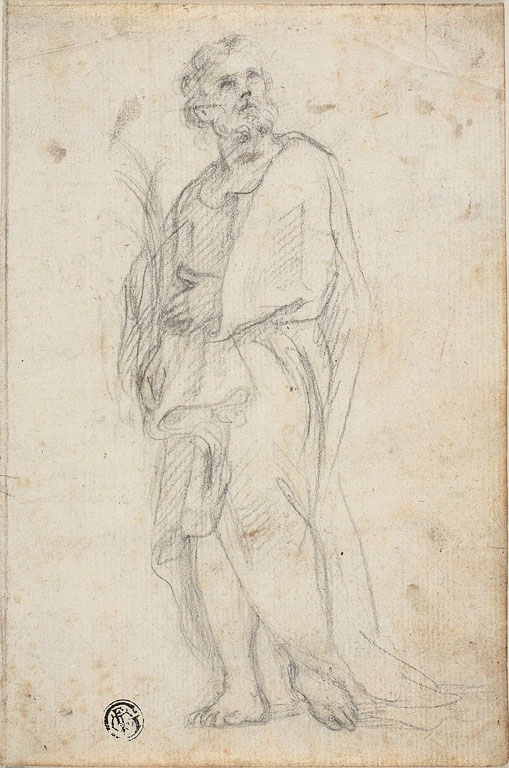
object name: Drawing and Watercolor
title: Saint with the Palm of Martyrdom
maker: School of Carlo Maratti (Italian, 1625-1713)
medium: Black chalk on ivory laid paper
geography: Italy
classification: chalk; drawings (visual works); prints and drawing